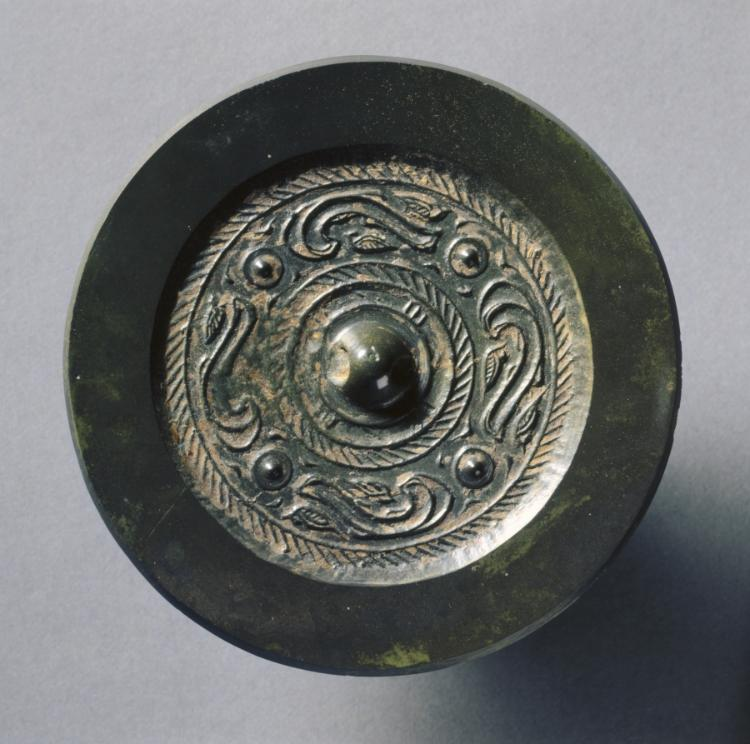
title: Mirror with Four Nipples, Quasi-Dragons, and Birds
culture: China, Western Han dynasty (206 BCE–8 CE)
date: late 300s BCE–50 CE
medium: bronze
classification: Metalwork